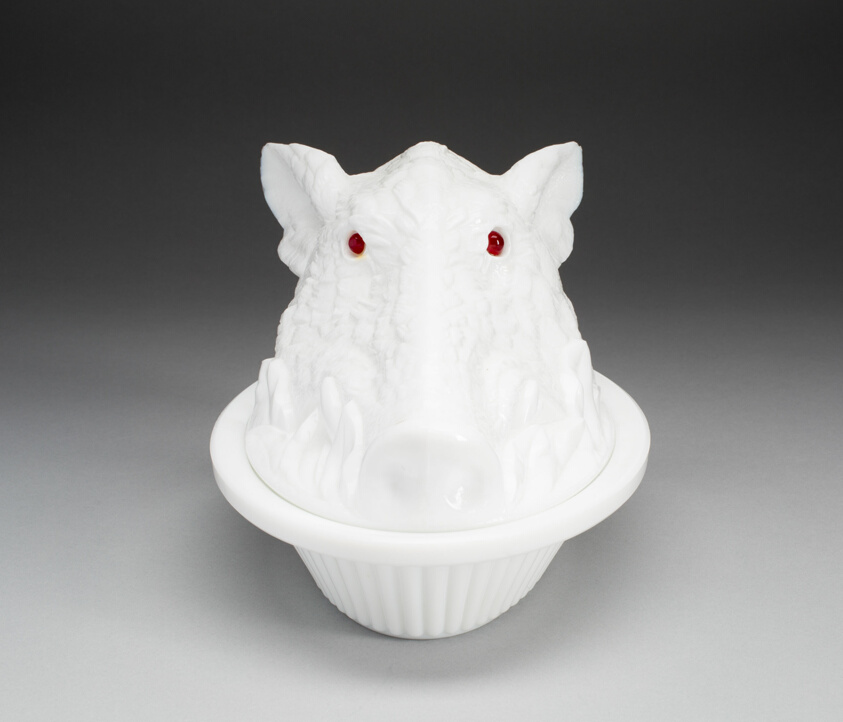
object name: Glass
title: Covered Dish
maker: Attributed to Atterbury Glass Co.; Pittsburgh, 1860–1893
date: 1888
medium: Glass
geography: Pittsburgh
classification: dish (vessel); milk glass; glass; american decorative arts; american arts; decorative arts